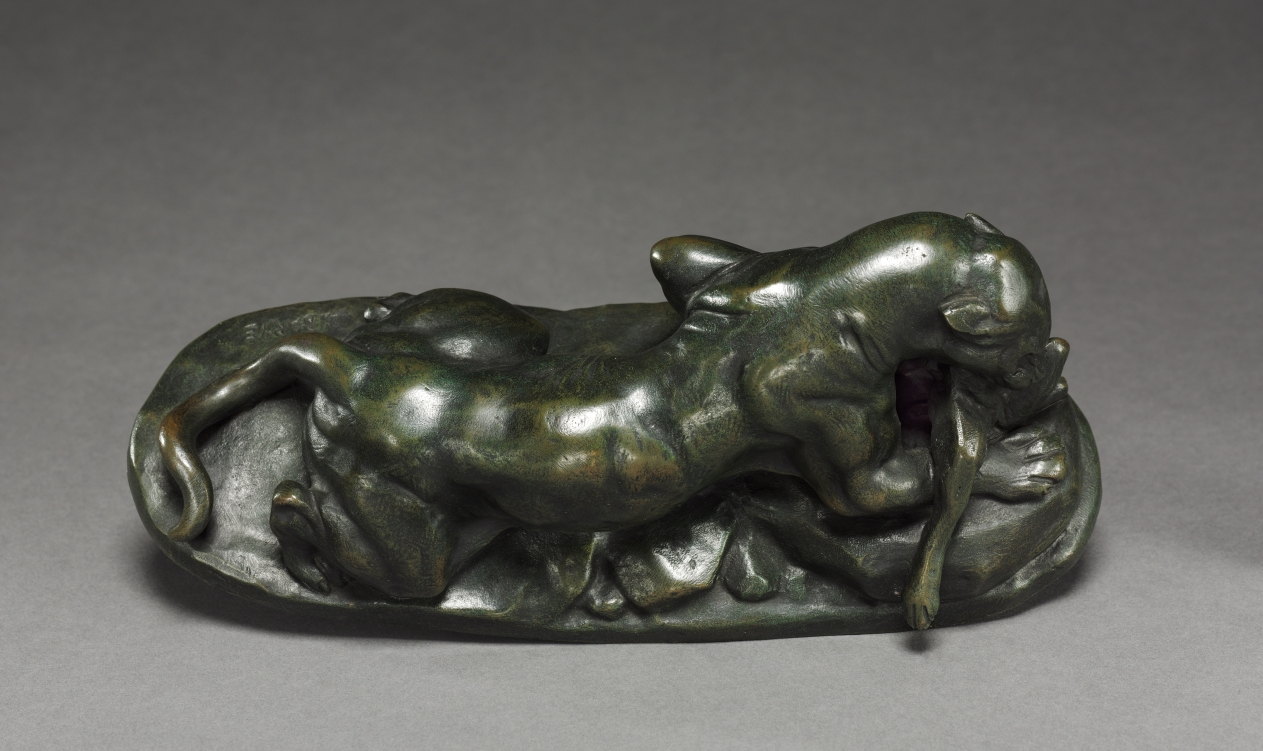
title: Jaguar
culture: France, 19th century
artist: Antoine-Louis Barye (French, 1796–1875)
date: c. 1850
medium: bronze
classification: Sculpture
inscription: On base, back of left hind leg: (L?). Barye"